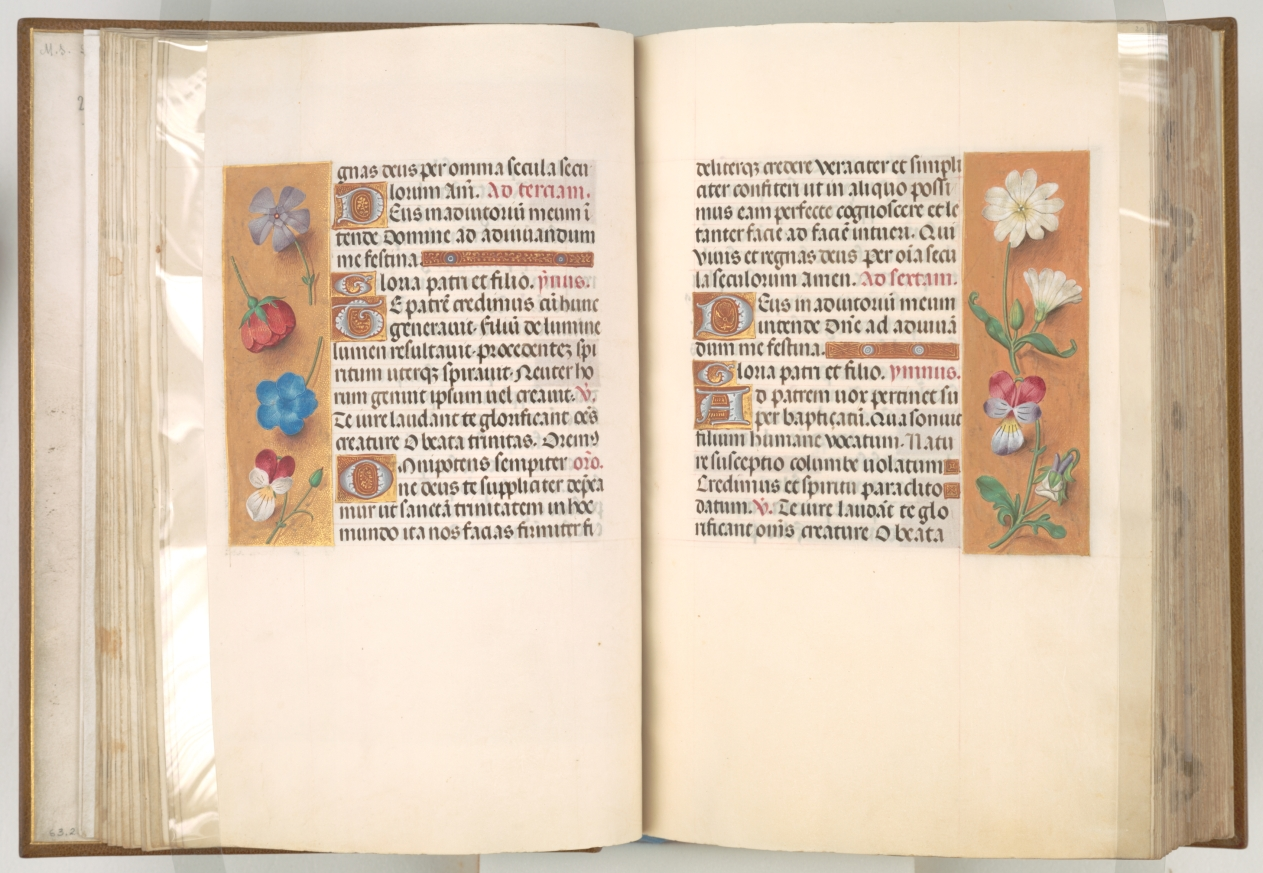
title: Hours of Queen Isabella the Catholic, Queen of Spain: Fol. 20r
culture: Flanders, Ghent and Bruges, late 15th century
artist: Master of the First Prayerbook of Maximillian (Flemish, c. 1444–1519)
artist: and Associates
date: c. 1500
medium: ink, tempera, and gold on vellum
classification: Bound Volume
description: This manuscript was illuminated by a circle of at least five highly organized manuscript painters active in the Flemish cities of Ghent and Bruges. The principal illuminator was Alexander Bening, who painted the majority of the book's miniatures. Manuscripts produced by this circle of artists are renowned for the decoration of their borders, which typically feature a rich variety of realistically-painted flowers, birds, and butterflies. This prayer book, called a book of hours, was intended not for a cleric, but for the private devotions of a lay person-in this case, Isabella the Catholic, Queen of Spain (1451-1504). Isabella's coat of arms embellishes the book's frontispiece. It is unlikely that the book was commissioned by the Queen herself; rather, she probably received it as a diplomatic gift from someone courting her patronage, perhaps Cardinal Francisco Jimenez de Cisneros. A Franciscan friar, Jimenez was dependent upon Isabella for his advancement, first to the post of Queen's confessor in 1492, and then to Archbishop of Toledo in 1495.